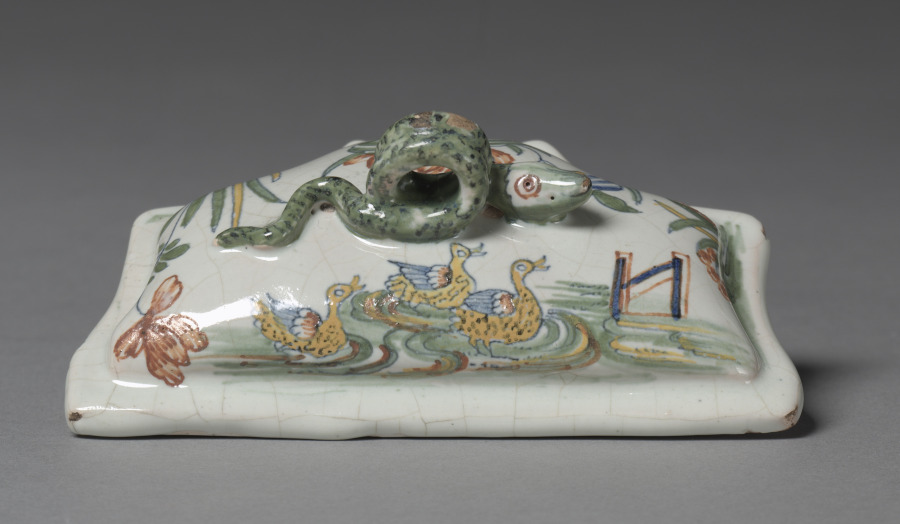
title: Lid from Writing Stand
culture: France, Sinceny, 18th century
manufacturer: Sinceny Factory (French)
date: 1746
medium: Tin-glazed earthenware (faience) with enamel decoration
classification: Ceramic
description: The faience factory at Sinceny was an offshoot of that at Rouen. In style, Sinceny closely resembles later Rouen wares with polychrome decoration. The stylized flowers and insects which decorate this writing stand are entirely typical of Sinceny faience.